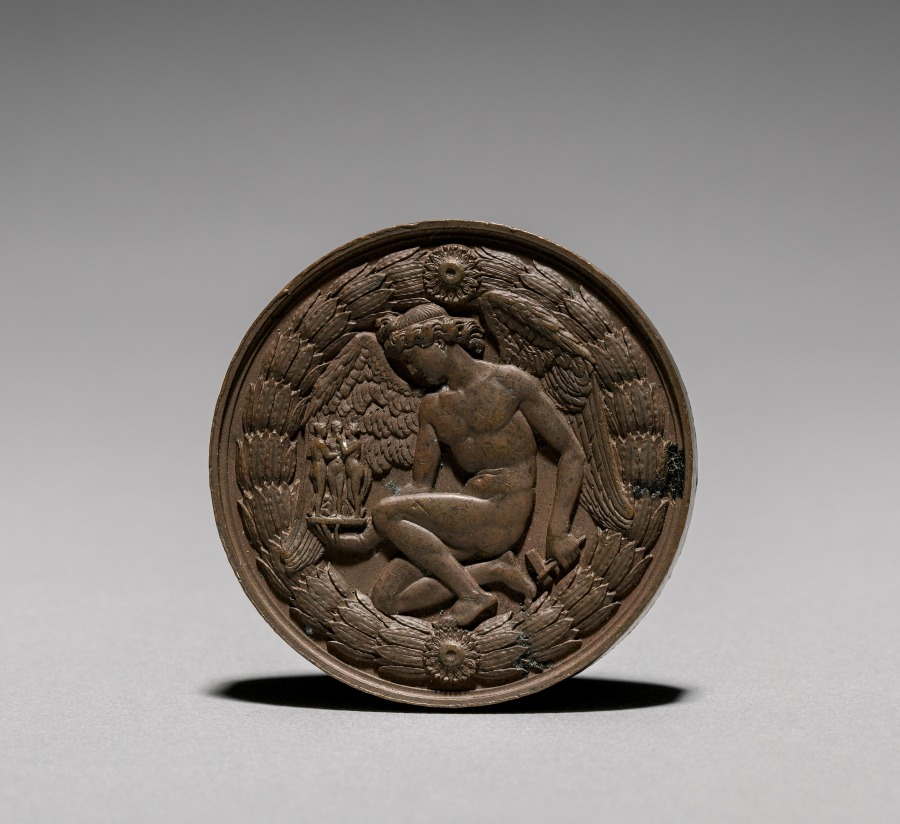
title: Medal: Albert Bertel Thorvaldsen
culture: Germany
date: 1828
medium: bronze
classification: Metalwork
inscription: "ALBERTVS THORWALDSEN"; signed: "F. Goetze."